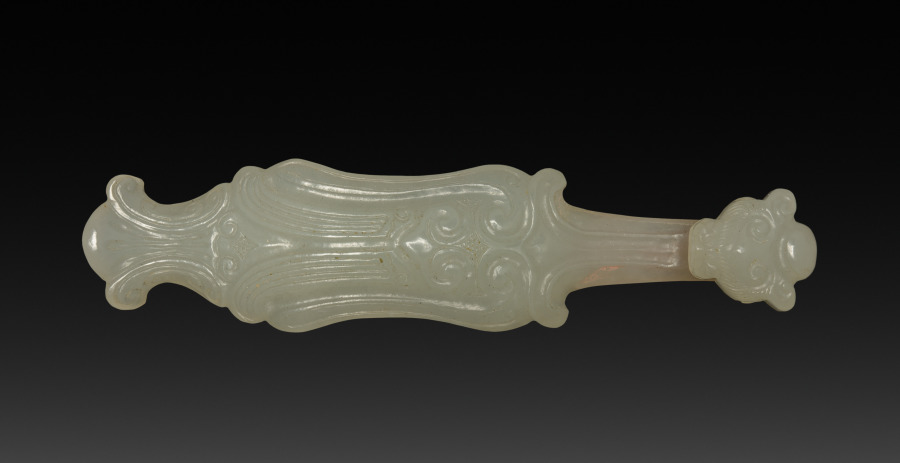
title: Buckle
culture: China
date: 1900s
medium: Jade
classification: Jewelry